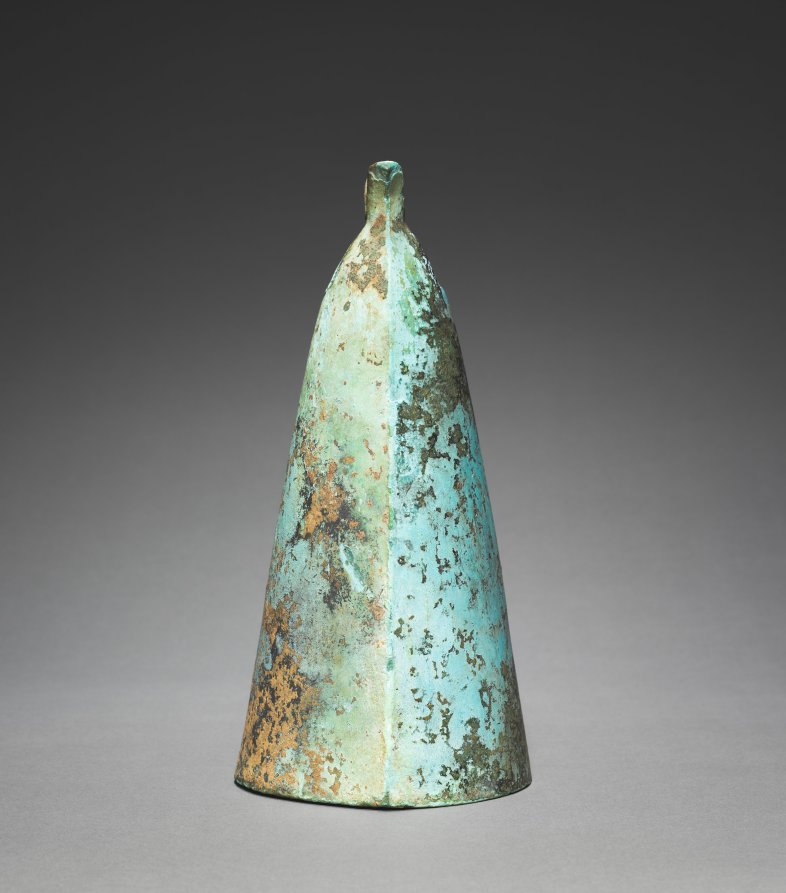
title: Bell with Diamond-Shaped Insignia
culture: China, along the southern borders, Eastern Zhou dynasty (770–256 BCE) to Han dynasty (202 BCE–220 CE)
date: 300s–100s BCE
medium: bronze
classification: Metalwork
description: These rare, elegant bronze bells were made in a tribal village along the southern borders of China. They differ greatly from bells made in the central regions, which often come in large sets and in varying sizes, and feature complex decorative patterns. The distinctive shape of these bells resembles a tall helmet topped by a pair of horns. A rope may have been tied around the horns so that the bells could be suspended. Each bell is decorated with a diamond-shaped insignia—probably to mark tribal affiliation. Although the bells are identical in size, each produces a different tone, which indicates that their casting was a highly refined process.